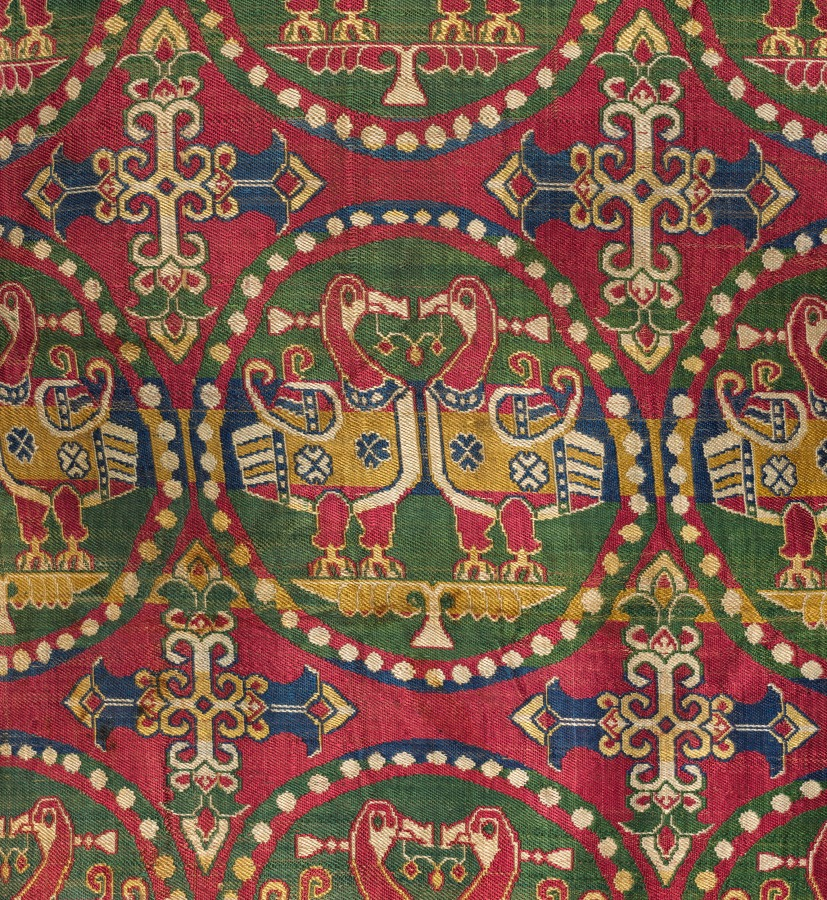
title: Child’s Coat with Ducks in Pearl Medallions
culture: Probably Sogdia (present-day Uzbekistan); China, Tang dynasty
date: 700s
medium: Silk: weft-faced compound twill weave (samite)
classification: Garment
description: The coat’s outer fabric is woven in five brilliant colors featuring paired ducks in pearl roundels, hallmarks of the precious and highly desired silks from Sogdia. The coat’s inner lining is a twill damask with a floral pattern made in China. The combination of Sogdian and Chinese silks in one garment with Tibetan ownership history is evidence of the vital exchange and cultural interaction among the peoples living along the trade routes of the Silk Road. This precious coat was presumably made for a Tibetan prince. Given the coat’s pristine condition, though, it is unclear whether the garment was ever worn, or was used as a diplomatic gift or perhaps as currency.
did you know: This coat is part of a set of garments that originally included an outer pair of pants and silk boots made from the same fabric.